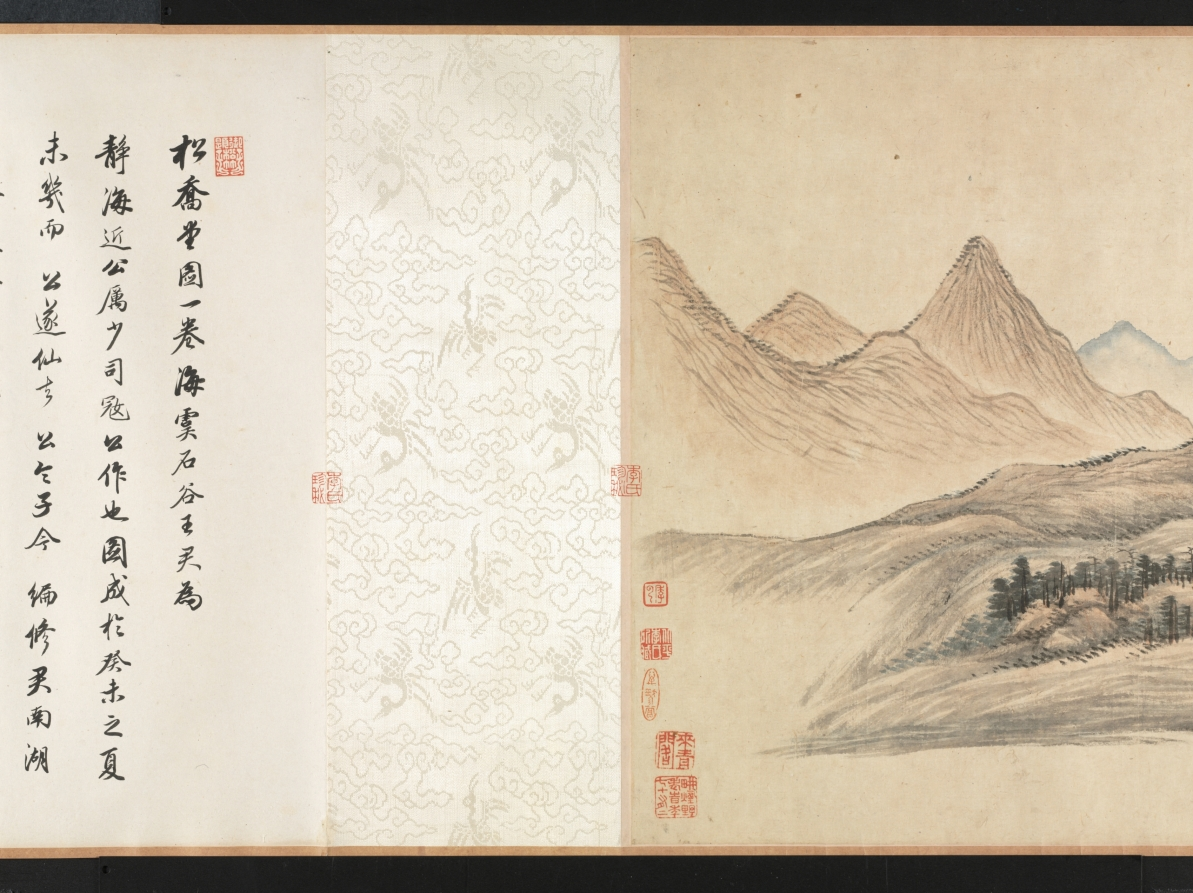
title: Hall of Lofty Pines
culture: China, Qing dynasty (1644-1911)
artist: Wang Hui (Chinese, 1632–1717)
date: 1703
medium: handscroll; ink and color on paper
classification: Painting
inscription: [題] 松喬堂圖 康熙癸未夏六月, 海虞耕煙散人王翬畫。[印]王翬之印; 石谷. [左下] 來青閣; 耕煙野老時年七十有二.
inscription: 松喬堂圖一卷，海虞石谷王君為靜海近公厲少司冦公作也。圖成于癸未之夏。未幾而公遂仙去。公令子今編修君南湖屬余題跋其後。余與公同官侍從，交契最深。側見公之清修純德，蔚為聖天子所眷重。侍直內廷，密勿贊襄，幾二十餘年。蒼生之所以受賜，士林之所以沐德者，天下莫能窺，在廷莫能悉。而公卒不言。以故宸衷日益契，恩禮亦日益渥。雖年逾懸車，時有歸老之念。而上固不聼公之去。其所謂松喬堂者，御書以賜公者也。蓋以松比公之清風勁節，而歲寒不改，經霜彌茂。則又以期公之壽考未有艾焉。公知此身未易乞，而山林槃磵之樂，止可寄諸寤思。此松喬堂圖之所由作也歟。石谷此圖，結構精密，筆墨超邁。其寫樹木之蒼蔚，堂宇之靚幽。恍見摩詰輞川樂天廬山之勝。獨惜公未得一日徜徉故園以償其願。即繪於圖亦未得以永其趣，此編修君之所以眷眷不忘也。雖然千歳之松喬，下蔭百畝，上以修棟梁之需。然則上當日名堂之意，不更望於後之人襲其芘而養其材也哉。吾願編修君之寶斯圖。并望君之塗塈丹雘，大其堂構也已矣。 康熈丙戍重陽三日，雲間王鴻緒跋。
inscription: 10 additional seals: 1 seal of Li Duna 勵杜納 (1628–1703); 4 seals of Zha Ying 查瑩 (jinshi of 1766); 5 seals of Li Yun (dates unknown).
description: Wang Hui 王翬, a leading painter in the orthodox school of the early Qing dynasty (1644–1911), was commissioned to paint this landscape with a country estate for Li Duna 勵杜納 (1628–1703), vice minister of justice in Emperor Kangxi’s court. The emperor had honored Li by granting him a piece of calligraphy with the name of Li’s retirement retreat, “Hall of Lofty Pines.” He drew a comparison between pines and Li’s upright character, resilience, and longevity. Wang Hui’s painting was supposed to allow Li to imagine living in a beautiful, secluded compound among the hills and pines. Sadly, Li died before seeing the completed painting and before receiving the emperor’s permission to retire. The landscape begins with peaceful riverbanks and low hills. The pines around the estate in the middle of the handscroll are truly lofty, some stretching even beyond the frame of the painting. Li Duna, the estate’s owner, is shown twice in his serene mountain retreat: first approaching the entrance to the compound with two servants at the right, and then later in the scroll, to the left, reading in the comfort of an inner room.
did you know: One servant carries the estate owner's carefully wrapped qin, a type of zither.